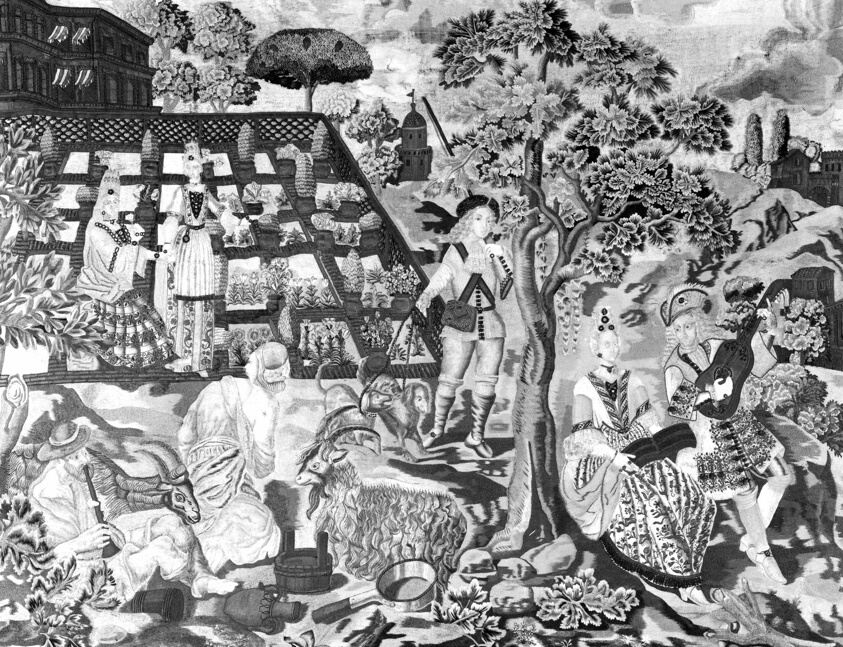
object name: Textile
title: Needlework Panel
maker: Portugal or England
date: Late 17th century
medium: Linen ground embroidered with silk and metal threads; attached pearls and mirrors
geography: Portugal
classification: textile; needlework (visual works)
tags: gardens, animals, English garden, foliage, hunting, landscapes, musical instruments, musicians, plants, trees